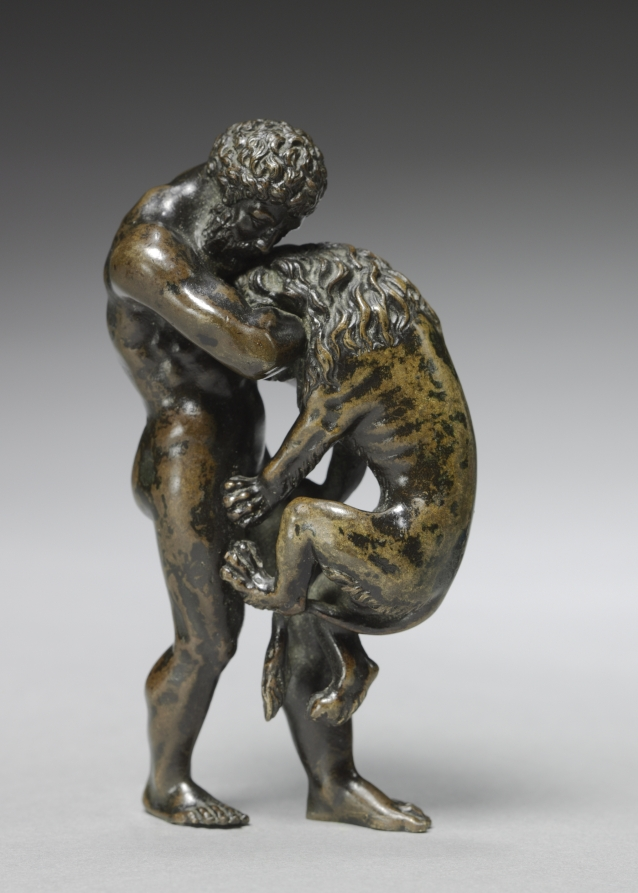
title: Hercules and the Nemean Lion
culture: Italy or France, 16th century or later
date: 1500s or later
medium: bronze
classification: Sculpture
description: The original owner of this work would have understood that this scene referred to the entire story of Hercules, the demi-god who had to accomplish twelve labors. The lion is named after the city of Nemea, near Corinth, a monstrous beast sent by the goddess Hera to wreak havoc on the area. After killing the lion, Hercules wore his pelt, commonly seen in other representations of the hero.